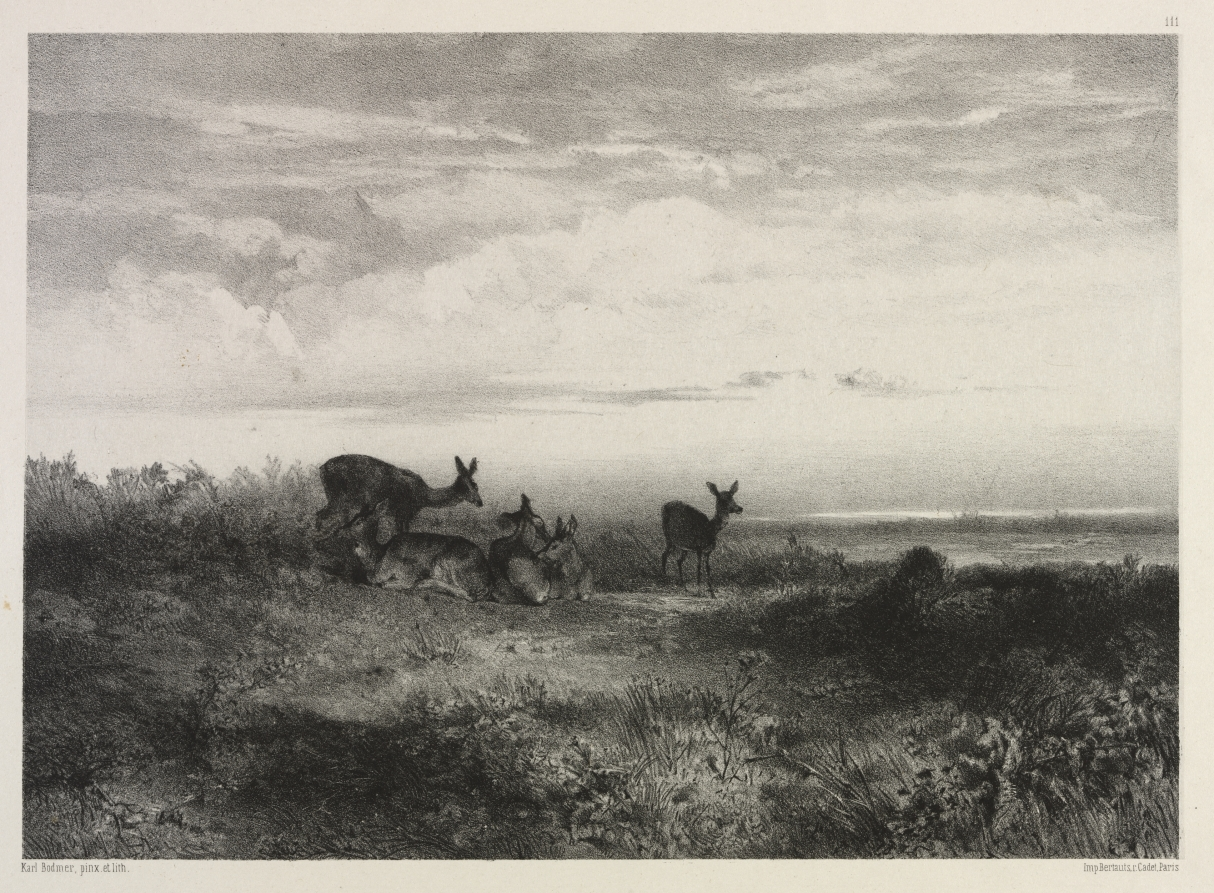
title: Landscape with Deer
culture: Switzerland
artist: Karl Bodmer (Swiss, 1809–1893)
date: c. 1840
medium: lithograph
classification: Print